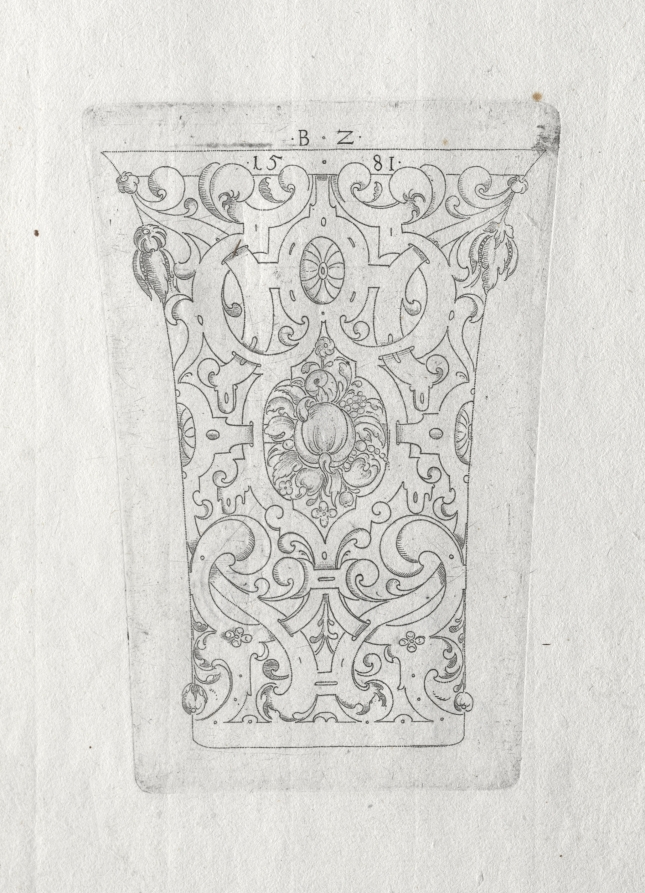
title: Ornamental Beaker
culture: Germany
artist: Bernhard Zan (German)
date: 1581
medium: engraving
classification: Print